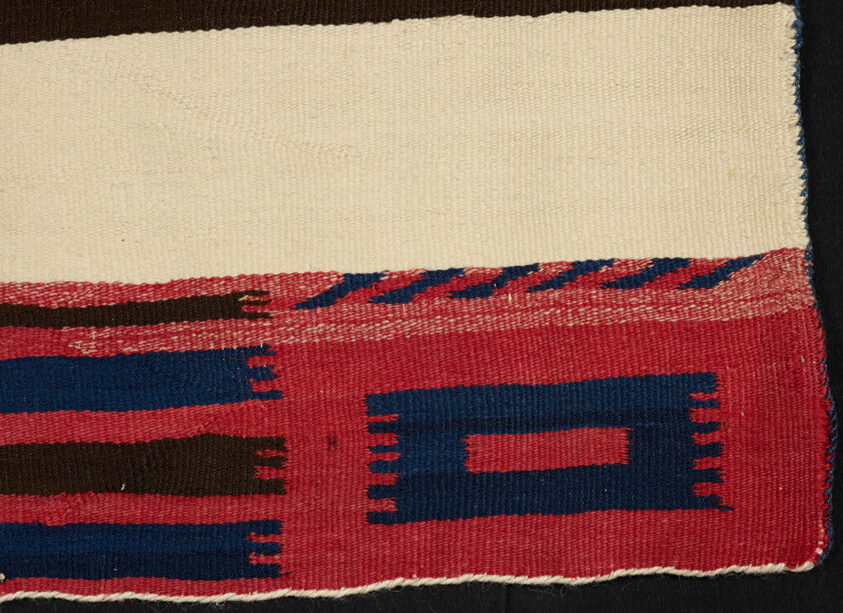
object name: Costume and Accessories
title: Wearing Blanket (Phase II)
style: navajo, americas, dine, 19th century, Arts of the Americas, indigenous, southwest, native american, north american, native north american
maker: Navajo (Diné) (Arizona, New Mexico, and Utah, United States)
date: 1850-65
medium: Wool; single interlocking tapestry weave; twined edges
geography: Navajo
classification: textile; blanket (covering); costume; garment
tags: geometric, arrow, squares, stripes